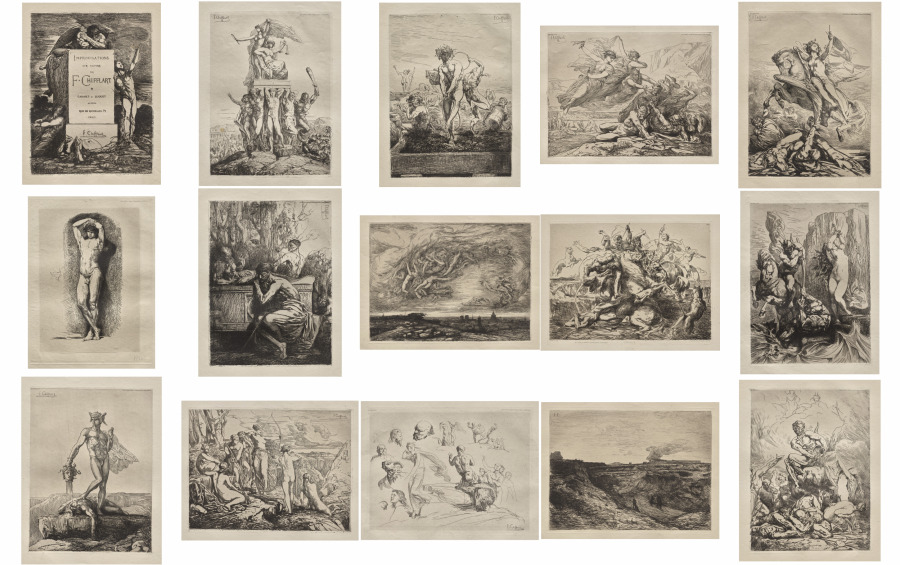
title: Improvisations sur cuivre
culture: France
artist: Nicolas-François Chifflart (French, 1825–1901)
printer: Auguste Delâtre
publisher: CADART & LUQUET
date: 1865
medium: 15 etchings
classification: Portfolio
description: François-Nicolas Chifflart was an important member of the etching revival in 19th-century France. This print, from his 1865 series Improvisations on Copper, reveals the freedom and experimentation that Chifflart found in this medium. He drew directly on prepared copper plates, sketching as he would on a sheet of paper, to create both anecdotal studies and imaginative finished compositions. Executed on an intimate scale, the prints encouraged close looking and private contemplation.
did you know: The prints of series like François-Nicolas Chifflart’s Improvisations on Copper were often separated over time; complete sets like this one are rare today.